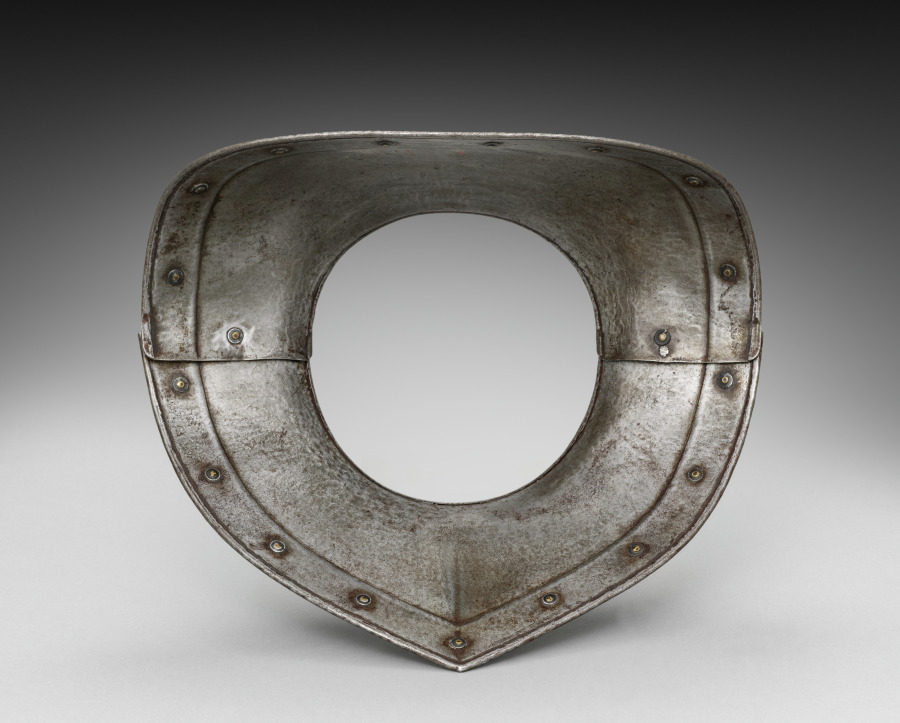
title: Colletin (two pieces)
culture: Germany, 19th century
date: 1801–1900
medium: steel with black paint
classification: Arms and Armor